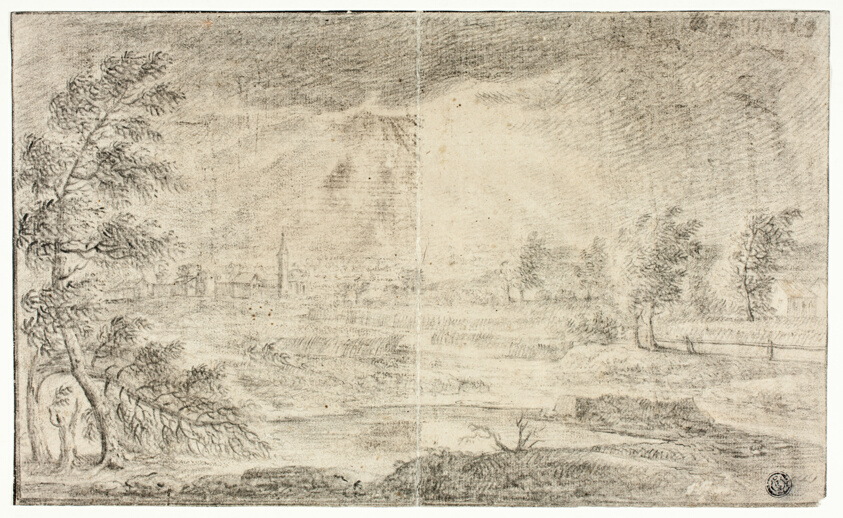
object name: Drawing and Watercolor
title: Landscape with Village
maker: Unknown Artist; Netherlandish, 18th century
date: 1720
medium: Black chalk on cream laid paper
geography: Netherlands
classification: chalk; drawings (visual works); prints and drawing